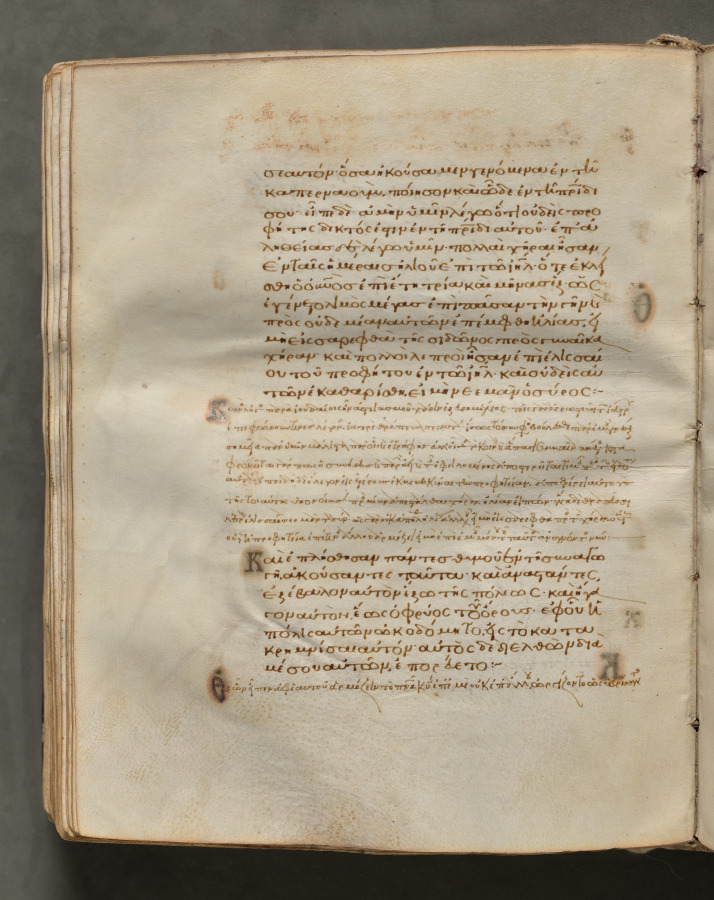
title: Text, folio 220 (verso), from a Gospel Book with Commentaries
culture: Byzantium, Constantinople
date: c. 1000–1100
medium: ink, tempera, and gold on vellum; leather binding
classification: Bound Volume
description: Each of the four gospels in this book opens on a page with brilliantly illuminated borders depicting the author of the text as well as birds-principally peacocks, symbols of the immortality of the soul-and fountains, representing the fountain of life and the salvation of the soul. This volume consists of 428 leaves with texts in Greek. Its level of sophistication suggests that it was probably written and decorated in a monastery in Constantinople.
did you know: Gospel Books were carried in procession through Byzantine churches.